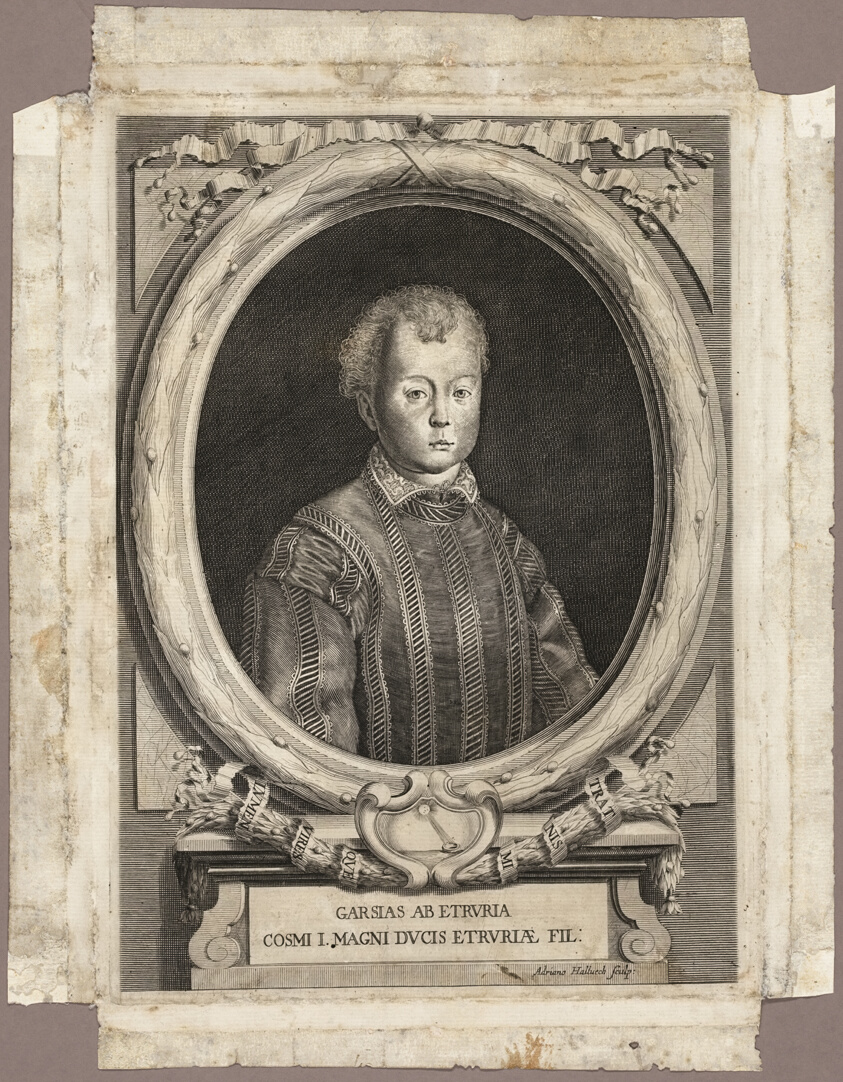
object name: Print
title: Cosimo I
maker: Adriaen Haelwegh (Dutch, born 1637); published by Giuseppe Allegrini, Florence, 1761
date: 1666; published 1761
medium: Engraving on ivory laid paper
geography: Netherlands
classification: engraving; paper; print; prints and drawing